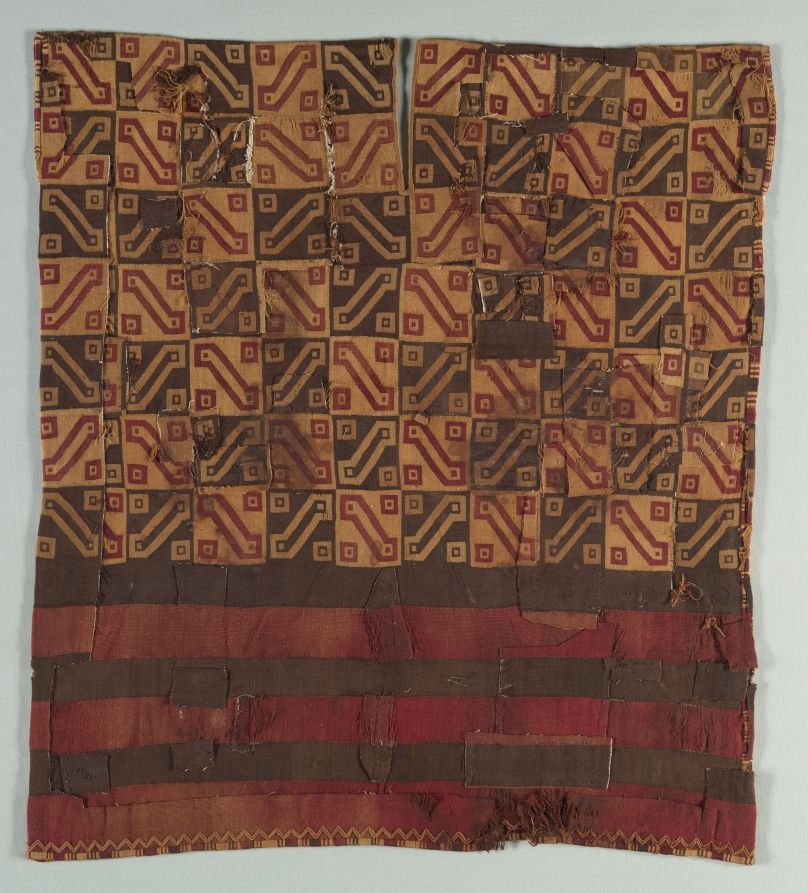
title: Tunic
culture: Peru, Inca, 15th-16th century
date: c. 1400–1540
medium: tapestry; cotton and camelid fiber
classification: Textile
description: Finely woven interlocked tapestry garments were a privilege of the nobility within the Inca Empire. Such garments were made throughout the vast Inca territory by women of noble families, by professional weavers, and by the Aclla (Chosen Women). These specialists lived in cloistered communities and served the state by brewing beer and weaving fine cloth. The products of their labor were redistributed by the Inca state as prized gifts to loyal vassals and allies. The standardized decorative scheme of this tunic, known as the Inca Key, is one of the most common Inca tunic patterns.